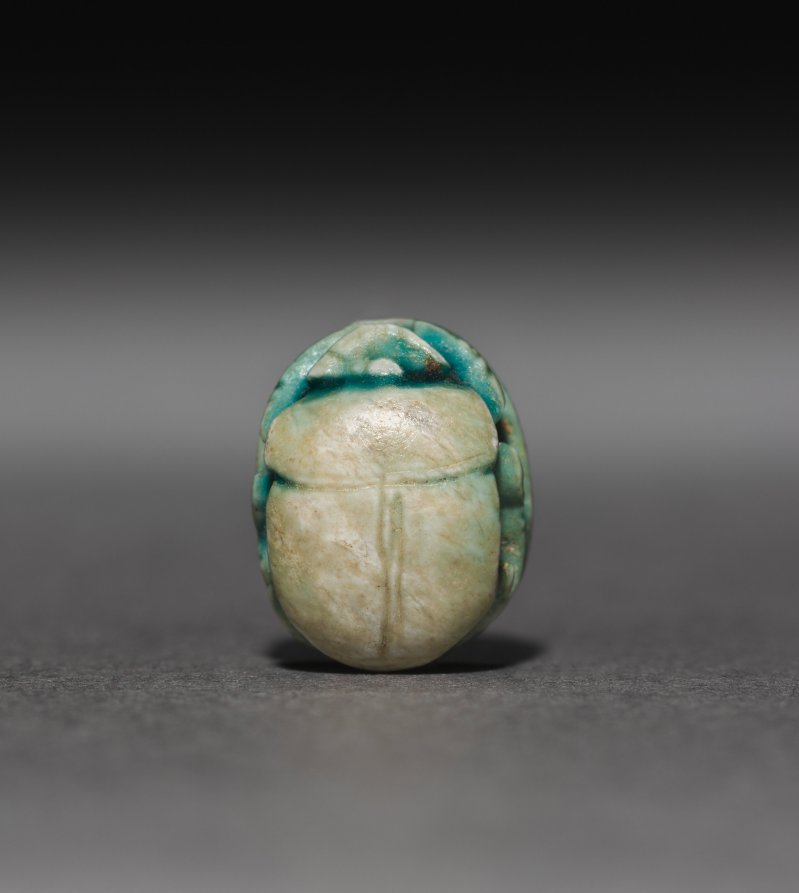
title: Scarab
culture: Egypt, Second Intermediate period (1648–1540 BCE)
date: 1648–1540 BCE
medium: steatite, traces of turquoise glaze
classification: Scarabs